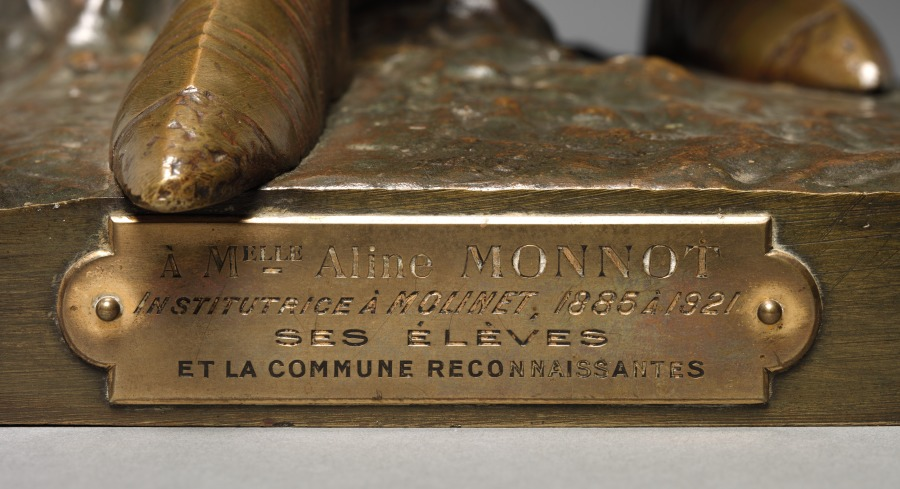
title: St. Joan of Arc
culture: France, 19th century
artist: Princesse Marie-Christine d' Orleans (French, 1813–1839)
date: 1836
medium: bronze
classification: Sculpture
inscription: Signed on top of base: "Marie d'Orléans."; inscribed on left side of base: "Susse Fres Edts Paris."